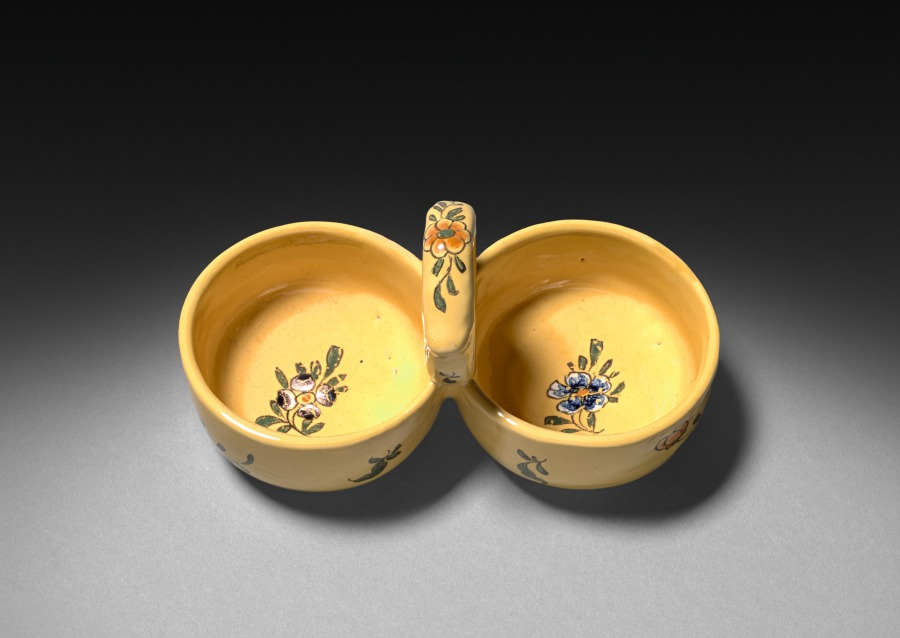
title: Double Salt Dish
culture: France, Moustiers, 18th century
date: c. 1775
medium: faience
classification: Ceramic